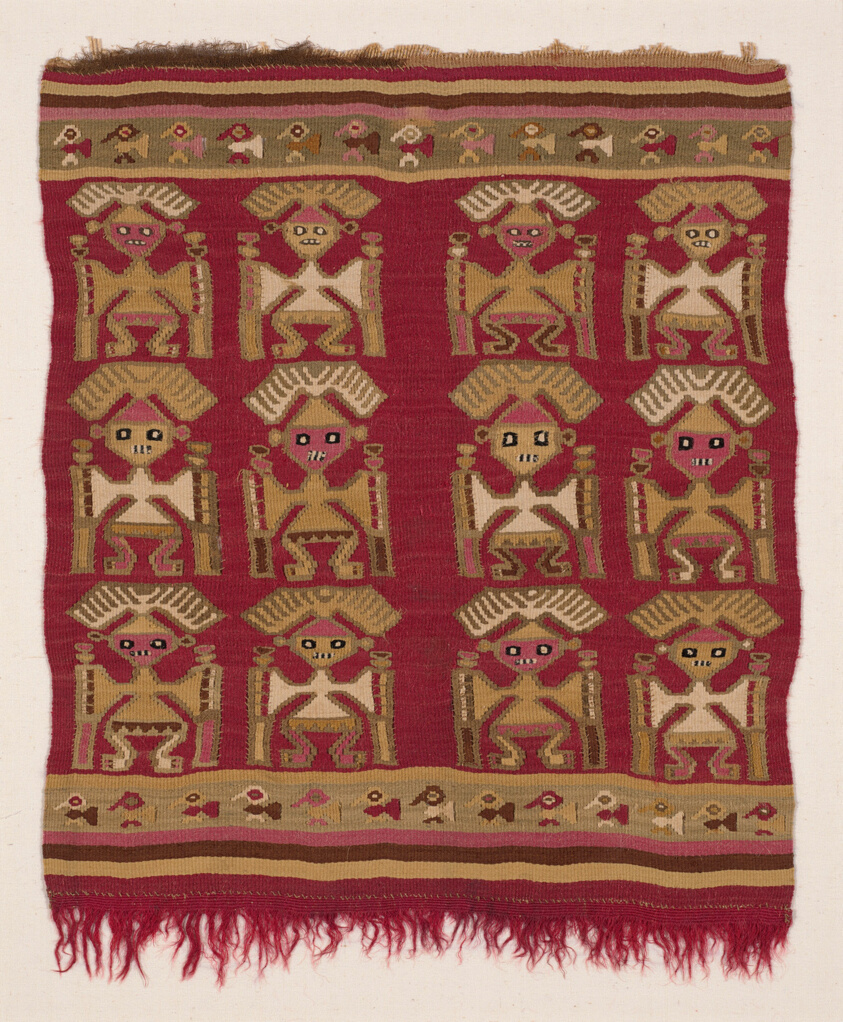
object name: Costume and Accessories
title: Fragment (Loincloth)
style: chimú, late intermediate period, Pre-Columbian, americas, andean, andes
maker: Chimú (Peru, Probably north coast)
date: A.D. 1250/1470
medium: Cotton and wool (camelid), slit tapestry weave; edged with plain weave extended weft cut fringe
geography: Peru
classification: costume - weaving; weaving; textile; costume; garment; costume component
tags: anthropomorphic figure, abstract motifs, grids, headdresses, Male, staffs, stepped motif